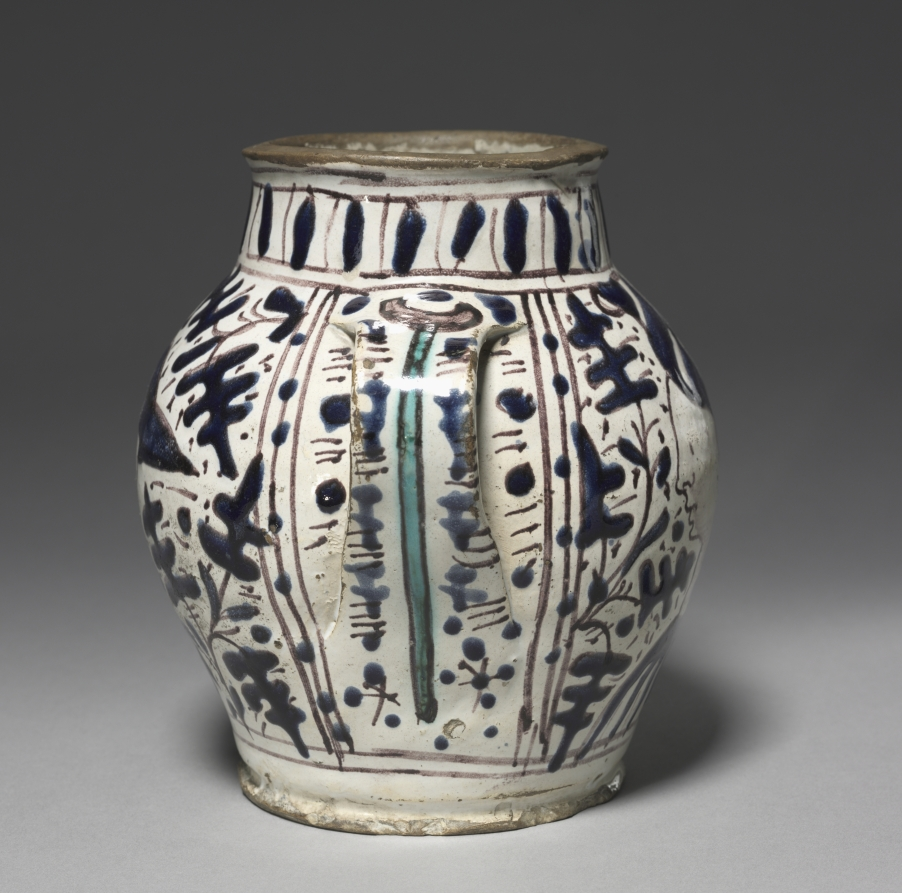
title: Two-Handled "Oak Leaf" Drug Jar with Male and Female Portraits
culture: Italy, Florence, 15th century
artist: workshop of Giunta di Tugio (Italian, c. 1382–1450)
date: 1431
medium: tin-glazed earthenware (maiolica)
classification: Ceramic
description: This two-handled drug container with a bulbous body and short neck belongs to a group of wares known as "oak leaf jars" because of their decoration. This example includes two profile busts amid blue-on-white oak leaves on branching stems. On each handle is a crutch, painted in green and manganese. This was the badge of the Hospital of Santa Maria Nuova in Florence. The star motif below the crutch is the workshop mark of the ceramist Giunta di Tugio, known to have received this commission in the year 1431. In the early Middle Ages hospitals were simple hospices set up outside cities to offer food and lodging to pilgrims and travelers. The Santa Maria Nuova hospital, by the mid-1300s the largest in Florence, was the first hospital in that city dedicated primarily to caring for the sick.